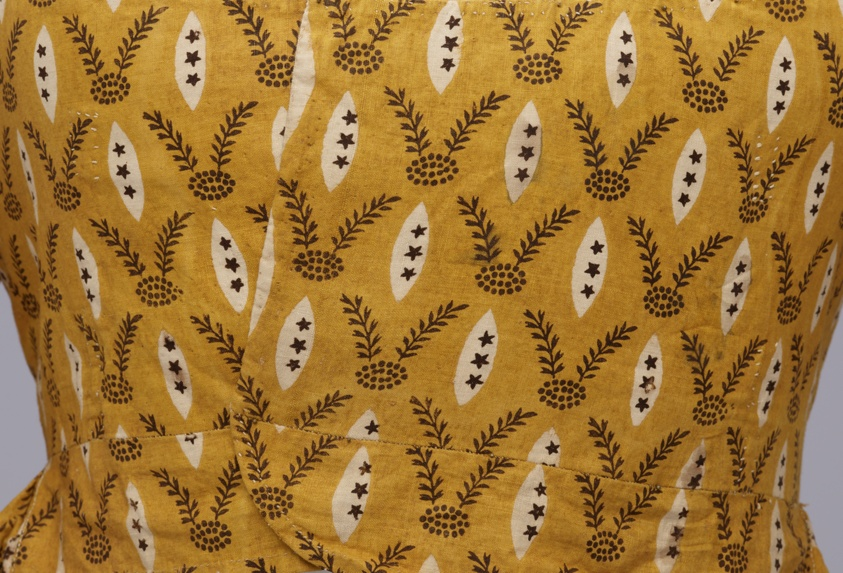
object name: Costume and Accessories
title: Woman's Spencer jacket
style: 17th Century, 18th Century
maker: France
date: c. 1800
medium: Cotton, plain weave, hand-block printed; cotton lining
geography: France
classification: dress (garment); costume - printed; costume - weaving; clothing; garment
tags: lattices, floral, stars, clothing